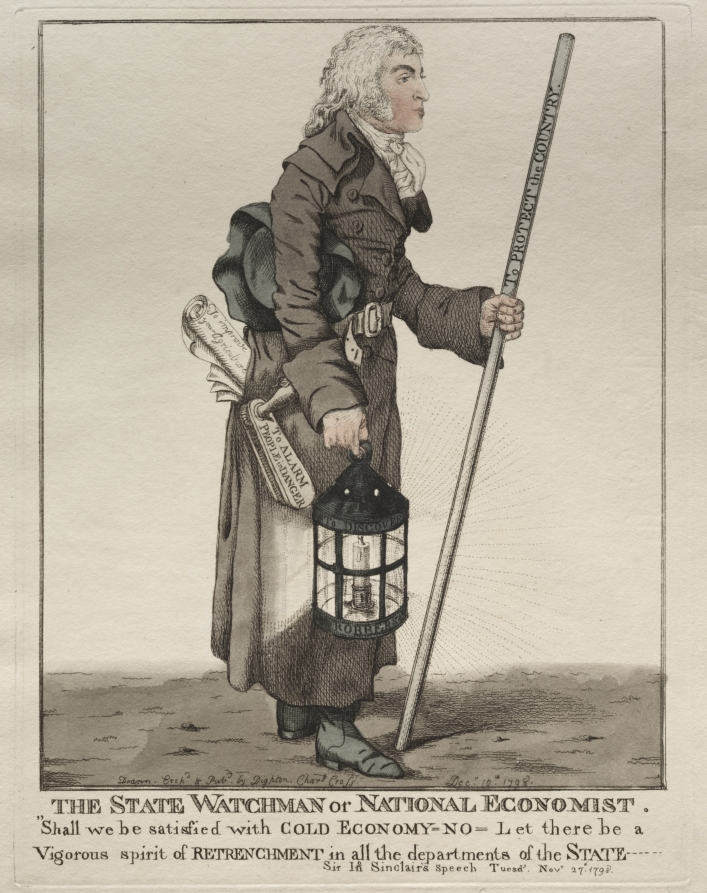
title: The State Watchman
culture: England, 19th century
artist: Robert Dighton (British, 1752–1814)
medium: etching with watercolor added by hand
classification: Print